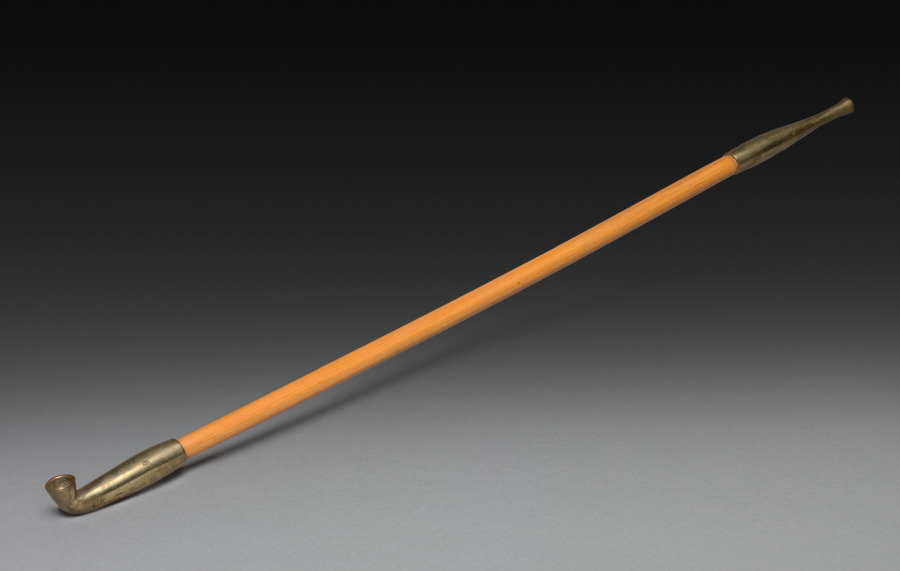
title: Tobacco Pipe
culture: Japan, Edo period (1615–1868)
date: 1700s–mid-1800s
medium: wood and metal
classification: Miscellaneous